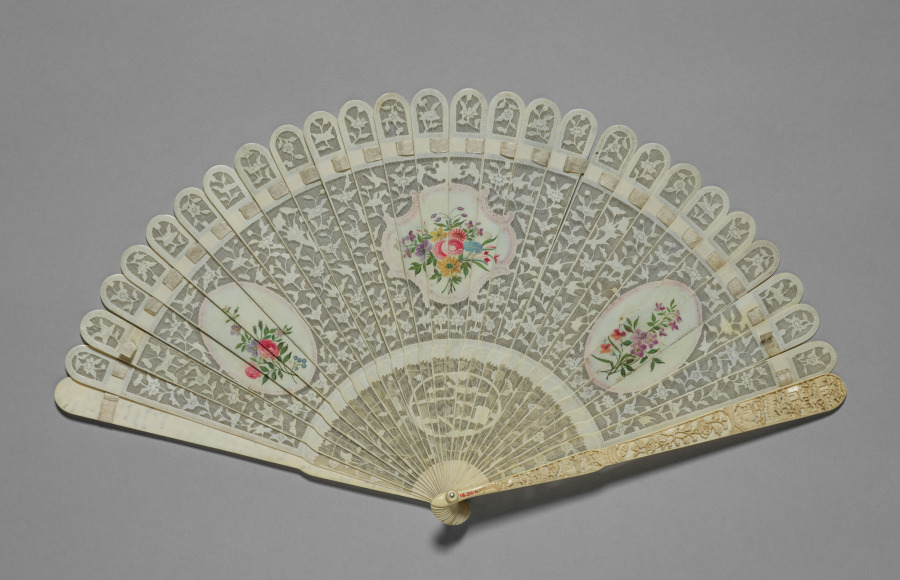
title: Brisé Fan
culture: China, 19th century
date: 1800s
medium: carved and pierced ivory sticks with three painted medallions in European style, held together by a white silk ribbon and an iron pin at the pivot point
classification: Ivory